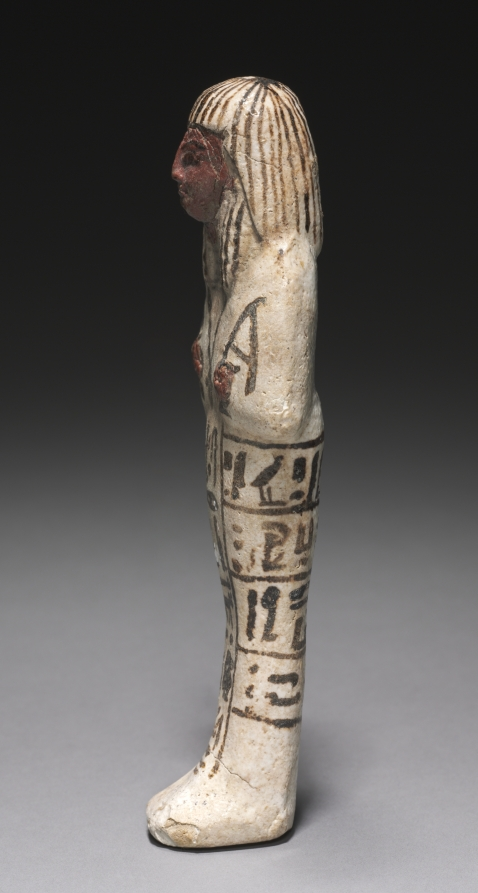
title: Shawabty of Djehutymose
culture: Egypt, New Kingdom (1540–1069 BCE), Dynasty 19, reign of Ramesses II (1279–1213 BCE)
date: 1279–1213 BCE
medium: polychrome faience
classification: Funerary Equipment